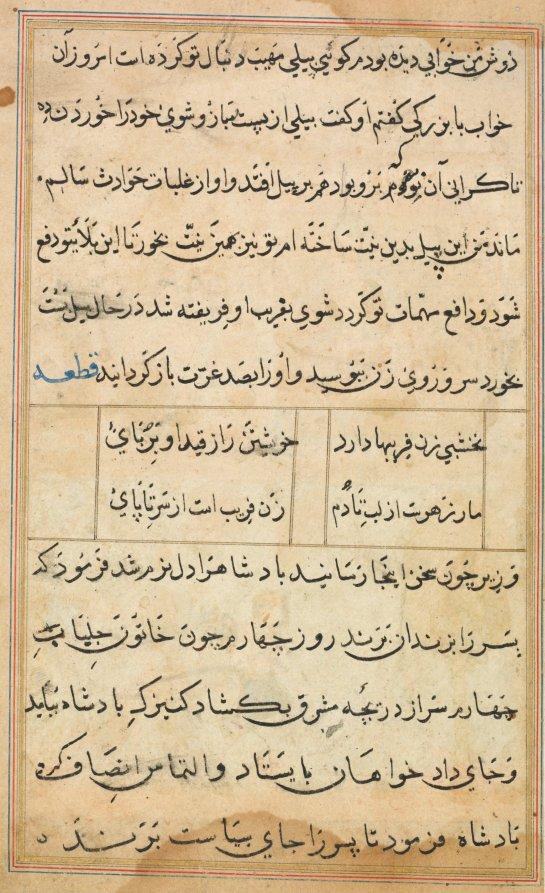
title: Page from Tales of a Parrot (Tuti-nama): text page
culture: Mughal India, court of Akbar (reigned 1556–1605)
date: c. 1560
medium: gum tempera, ink, and gold on paper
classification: Painting